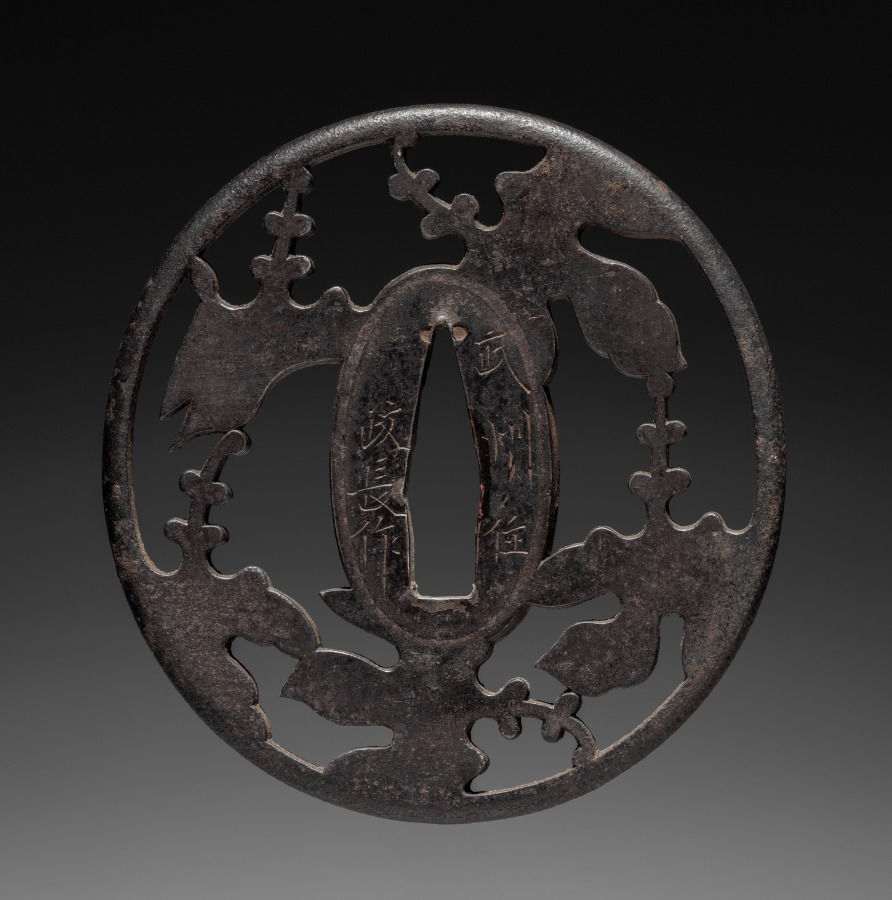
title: Sword Guard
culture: Japan, Edo period (1615–1868)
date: early 1800s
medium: iron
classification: Arms and Armor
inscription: Signature: Masanaga, residing in Musashi province, made